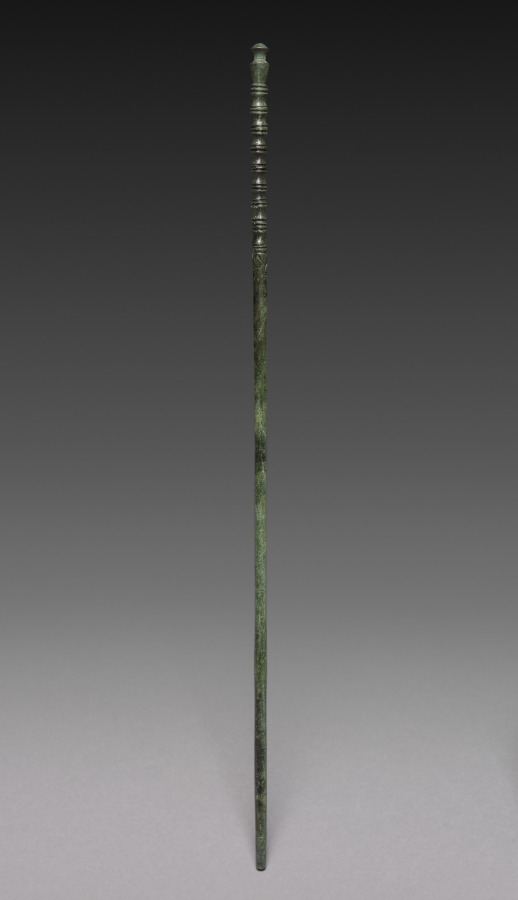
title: Chopstick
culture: Korea, Goryeo dynasty (918–1392)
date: 1000s-1100s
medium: bronze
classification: Implements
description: In Korea, chopsticks made of metal such as brass, silver, and gold were excavated from ancient tombs and ruins dated to the 6th century at the earliest. Burial goods often include utilitarian objects such as table wares and utensils because the dead were believed to need them in the afterlife.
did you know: In contrast to the Chinese and Japanese, Koreans still prefer metal chopsticks (stainless steel and brass) to wooden ones.